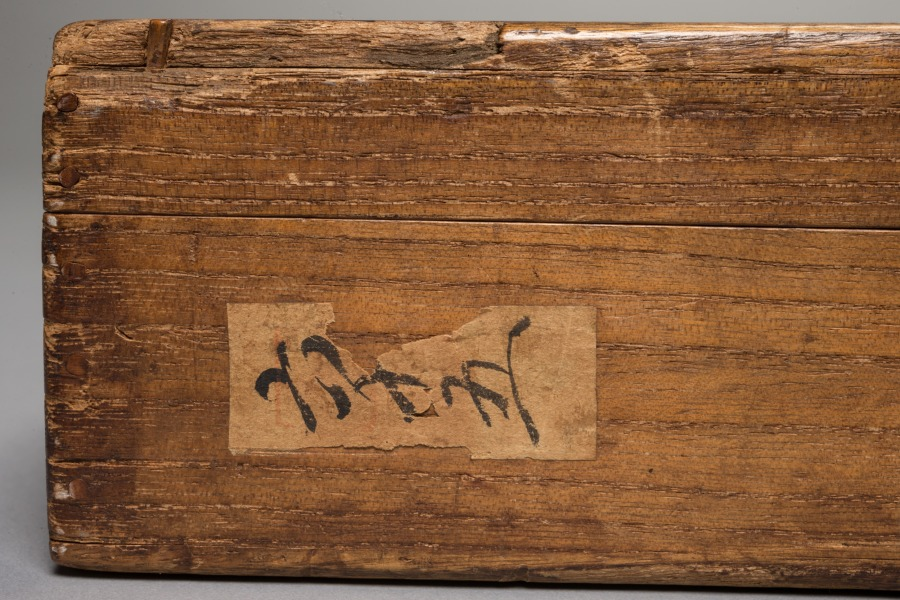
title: Bamboo in Rain; Bamboo in Wind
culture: Japan, Muromachi period (1392–1573)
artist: Genga (Japanese)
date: early 1500s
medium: hanging scroll; ink on silk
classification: Painting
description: East Asian paintings from China, Korea, and Japan were frequently conceived as sets of multiple images. These sets might have been composed for specific palace or temple rooms, or to portray a specific theme, such as the four seasons. Over time, the original intent of such sets is often lost through damage, changes in ownership, or a variety of other reasons. The identity of the artist can also be lost, but then, sometimes, retrieved. This pair of ink paintings has traditionally been labeled as Japanese and attributed to the 16th-century painter Genga. Since there are no seals or signature of the artist on the painting, this attribution was based on comparisons of brush style with paintings known to be by Genga. More recent study indicates that while the 16th century is an appropriate time frame for the pair, the precise cultural identity of the artist is not certain after all. The dark, eccentric shapes of the rocks and bamboo clusters and the dramatic tonal contrasts evident throughout the composition point to either Korean authorship or influence upon a Japanese painter of the period.